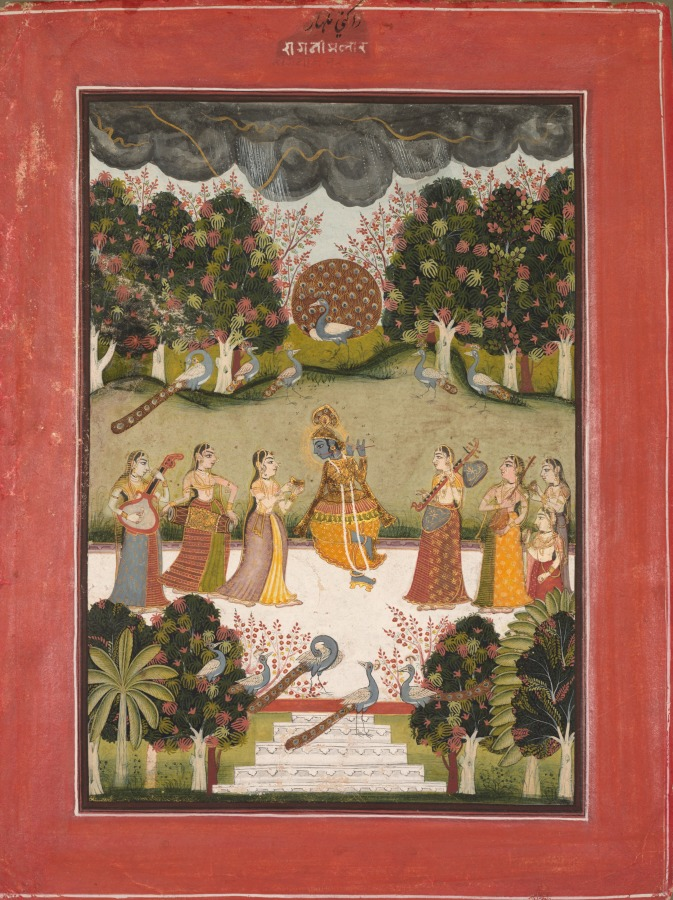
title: Malar Ragini: Krishna Playing the Flute to Seven Gopis Holding Musical Instruments, from the Ragamala Series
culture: India, Rajasthan, Bundi-Kota, 18th century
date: c. 1760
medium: color with gold and silver on paper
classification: Painting